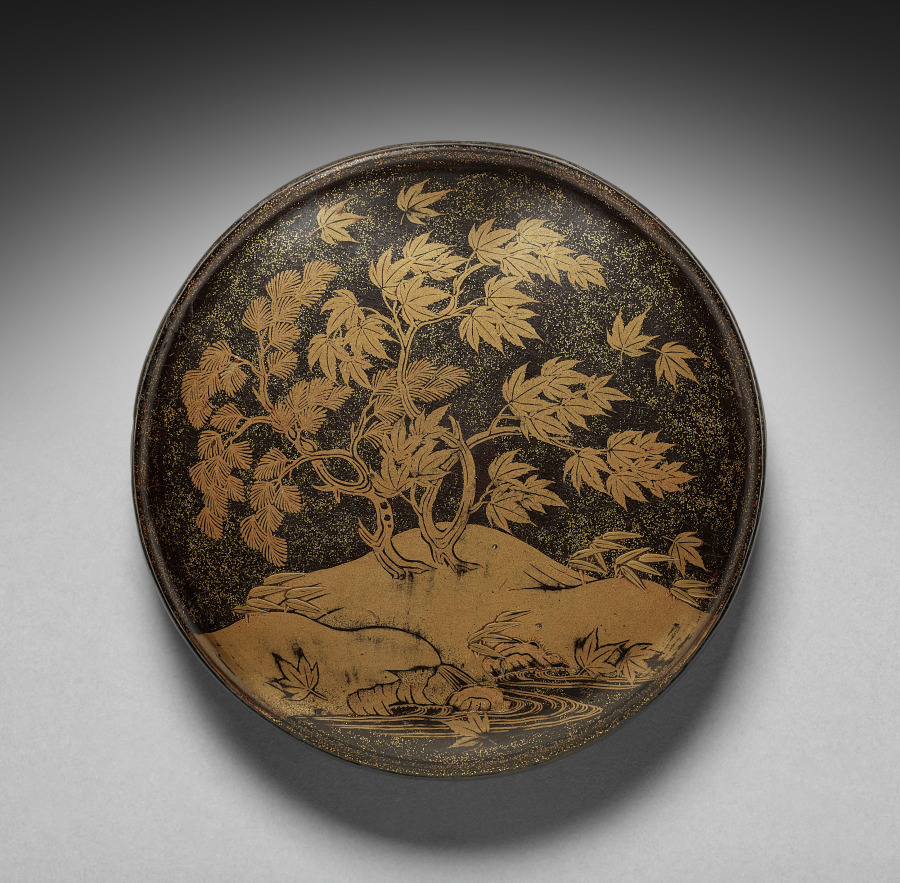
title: Mirror Container with Design of Maple Tree and Autumn Shower (lid)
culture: Japan, Muromachi period (1392–1573)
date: 1400s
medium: lacquer on wood with decoration in maki-e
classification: Lacquer